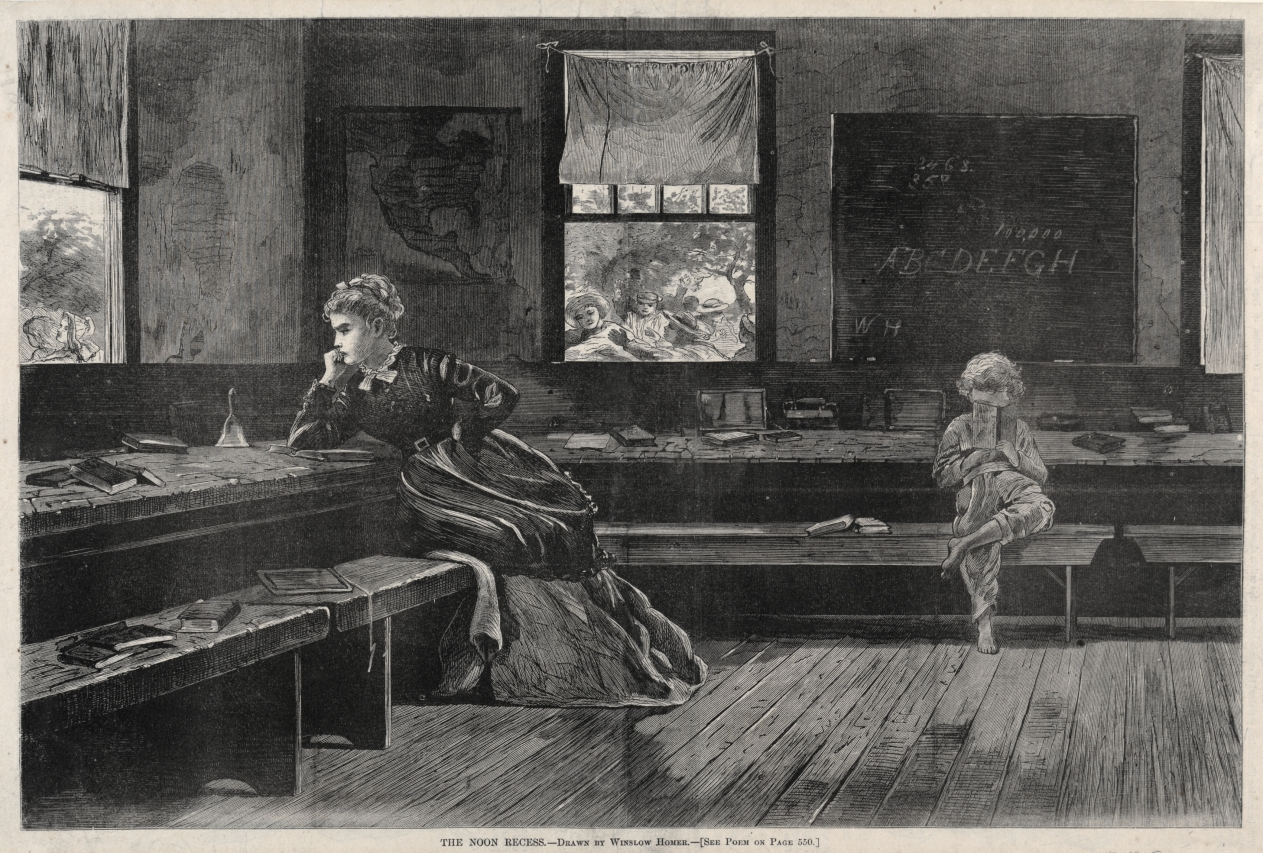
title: The Noon Recess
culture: America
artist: Winslow Homer (American, 1836–1910)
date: 1873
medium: wood engraving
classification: Print